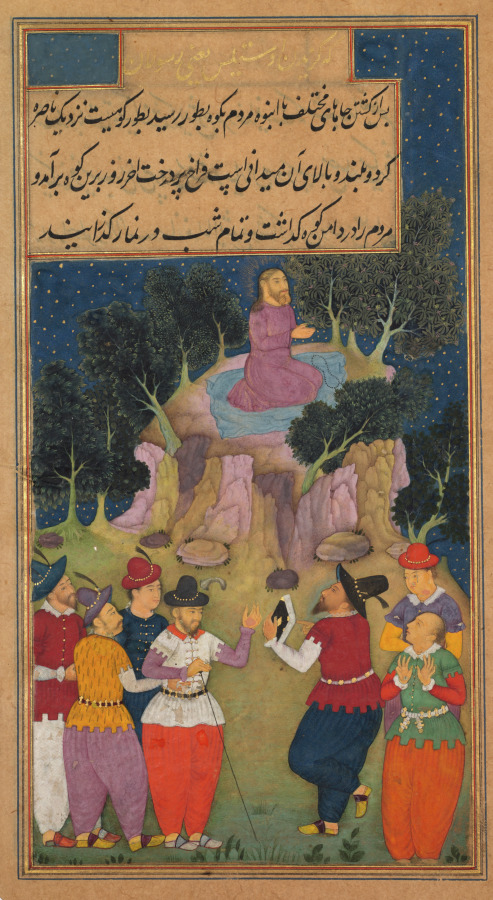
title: Jesus on Mount Tabor, near Nazareth where he Chooses Twelve of his Followers and Calls them Apostles (folio 87 verso), from a Mirror of Holiness (Mir’at al-quds) of Father Jerome Xavier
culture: Mughal India, Allahabad, made for Prince Salim (1569–1627)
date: 1602–04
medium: Gum tempera, ink, color, and gold on paper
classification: Manuscript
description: When Jesus arrived at Mount Tabor, he left his followers at the foot of the hill and spent the entire night in prayer. This is the only night scene in the manuscript, and the artist has used glowing colors and gold paint to dot the night sky with stars. Seven of the 12 apostles mill around the foreground; some converse with animated gestures, possibly debating the contents of a text. At dawn Jesus will have summoned the 12, named them his apostles and given them the power to drive out unclean spirits and heal the sick and infirm.